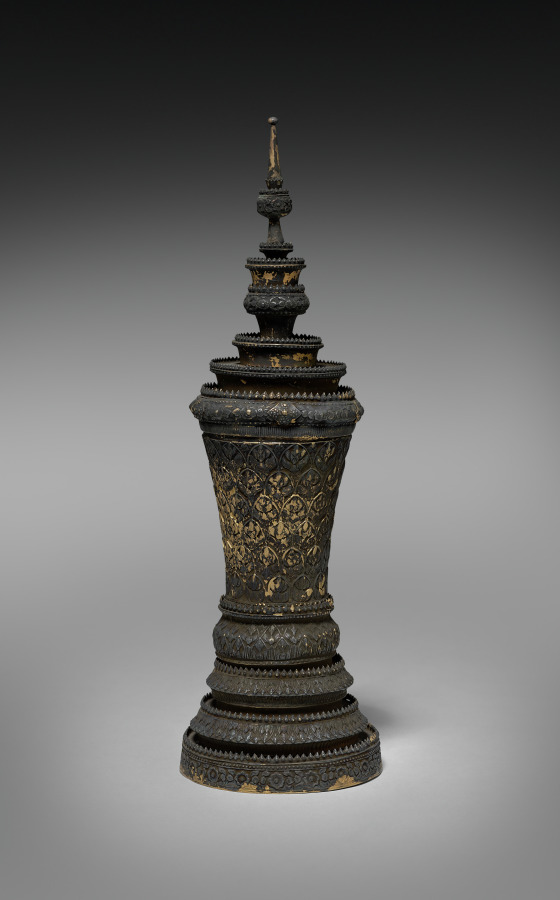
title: Burial Urn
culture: Siam, 19th century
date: 1800s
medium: gilded silver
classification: Metalwork